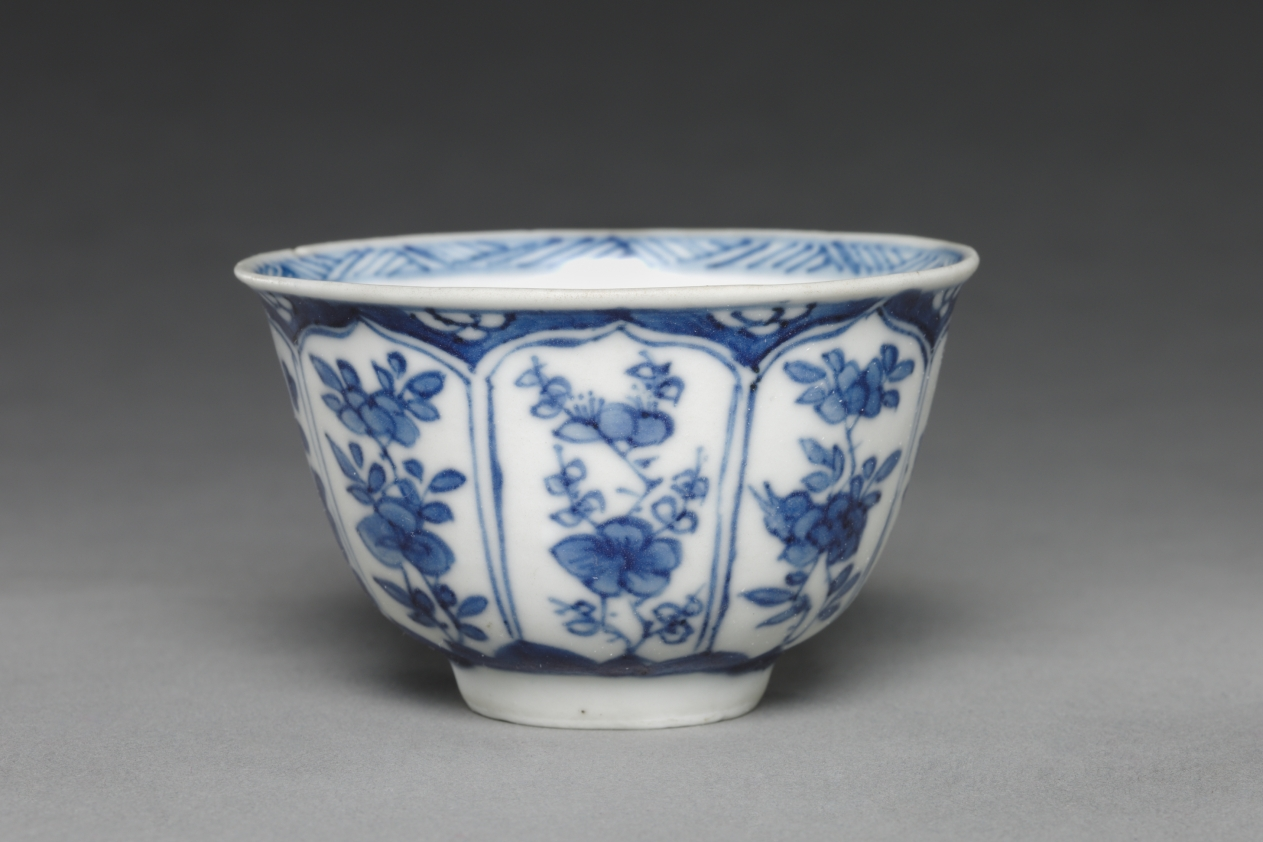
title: Tea Cup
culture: China, Qing dynasty (1644-1911)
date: c. 1690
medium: porcelain with blue and white decoration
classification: Ceramic